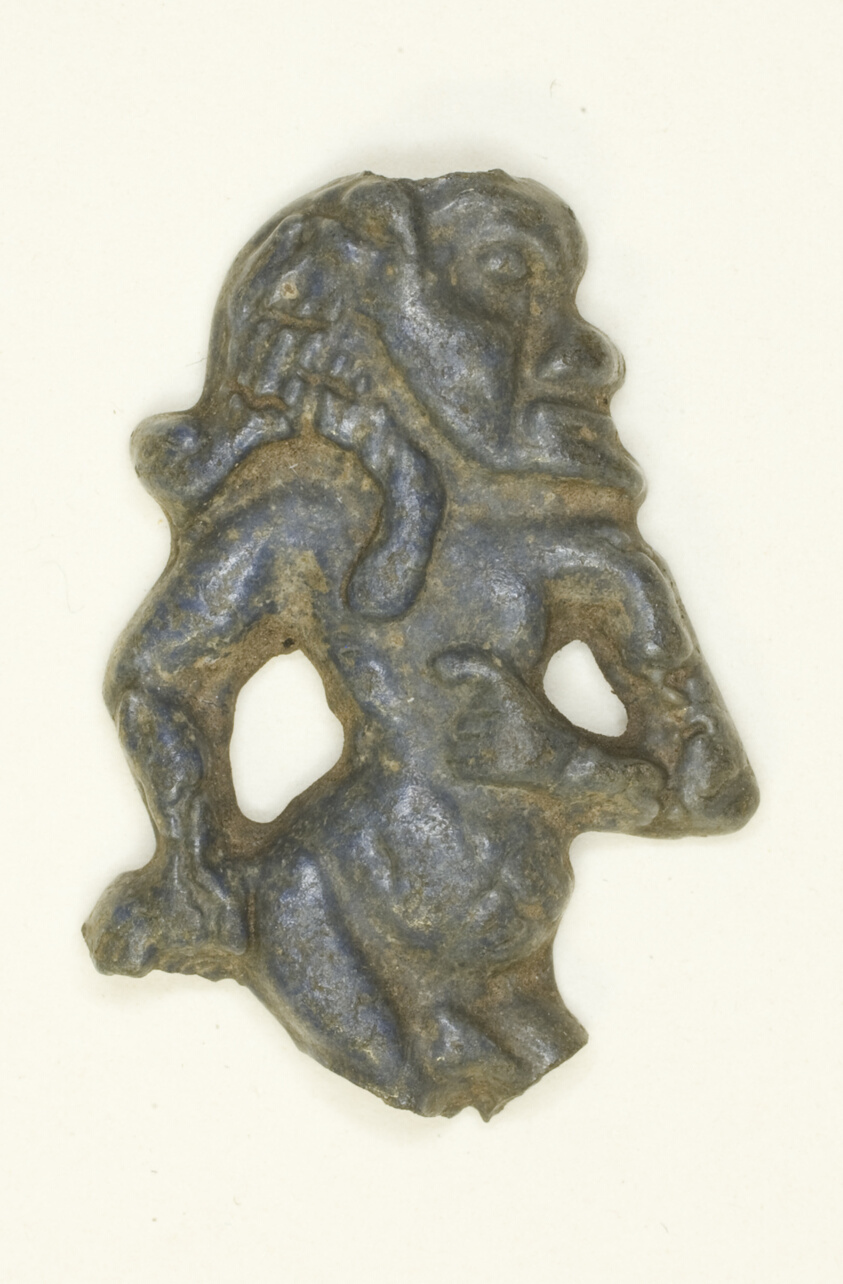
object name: Costume and Accessories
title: Amuletic Inlay of the God Bes Dancing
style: eighteenth dynasty, new kingdom, egyptian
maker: Egyptian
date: New Kingdom, late Dynasty 18 (1336–1293 BCE)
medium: Faience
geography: Egypt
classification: amulet; ceramics; jewelry; ancient art; costume; faïence (composite material)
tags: gods (deities)